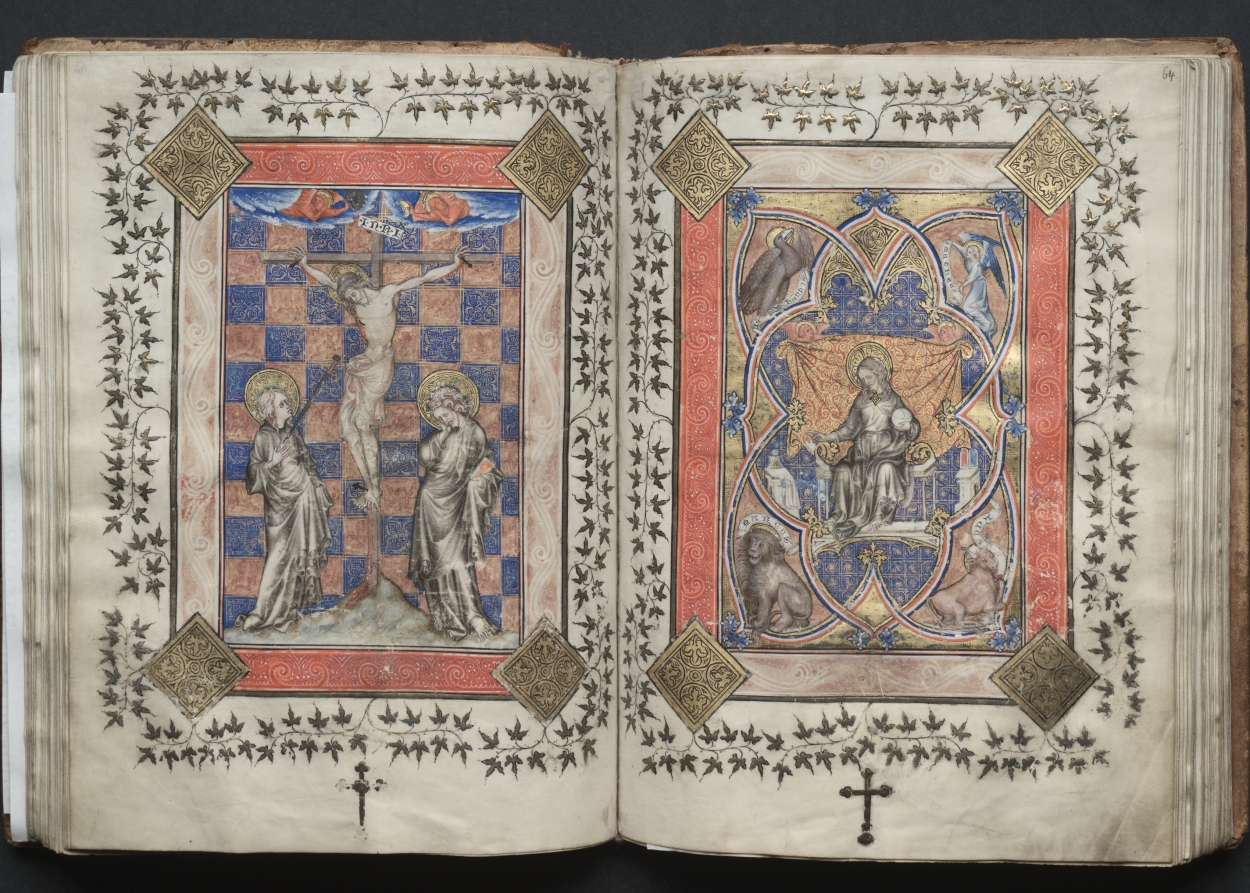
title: The Gotha Missal: Fol. 63v, Crucifixion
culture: France, Paris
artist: Master of the Boqueteaux (French)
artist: and Workshop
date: c. 1375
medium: ink, tempera, and gold on vellum; blind-tooled leather binding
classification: Bound Volume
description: The style and quality of this manuscript's decoration is typical of deluxe Parisian books made for aristocratic or royal patrons. Most of the book's decoration appears to be the work of the Master of the Boqueteaux, an artist active at the court of King Charles V (died 1380). His style was apparently shared by a number of book illuminators working in and around Paris. It is very possible that the Gotha Missal belonged to Charles V, but is not provable because the manuscript has no royal portraits and lacks a colophon. Given the book's magnificent decoration, however, it would seem that it was produced for a Valois prince, if not for the king himself. The manuscript receives its name from the German dukes of Gotha, its later owners.